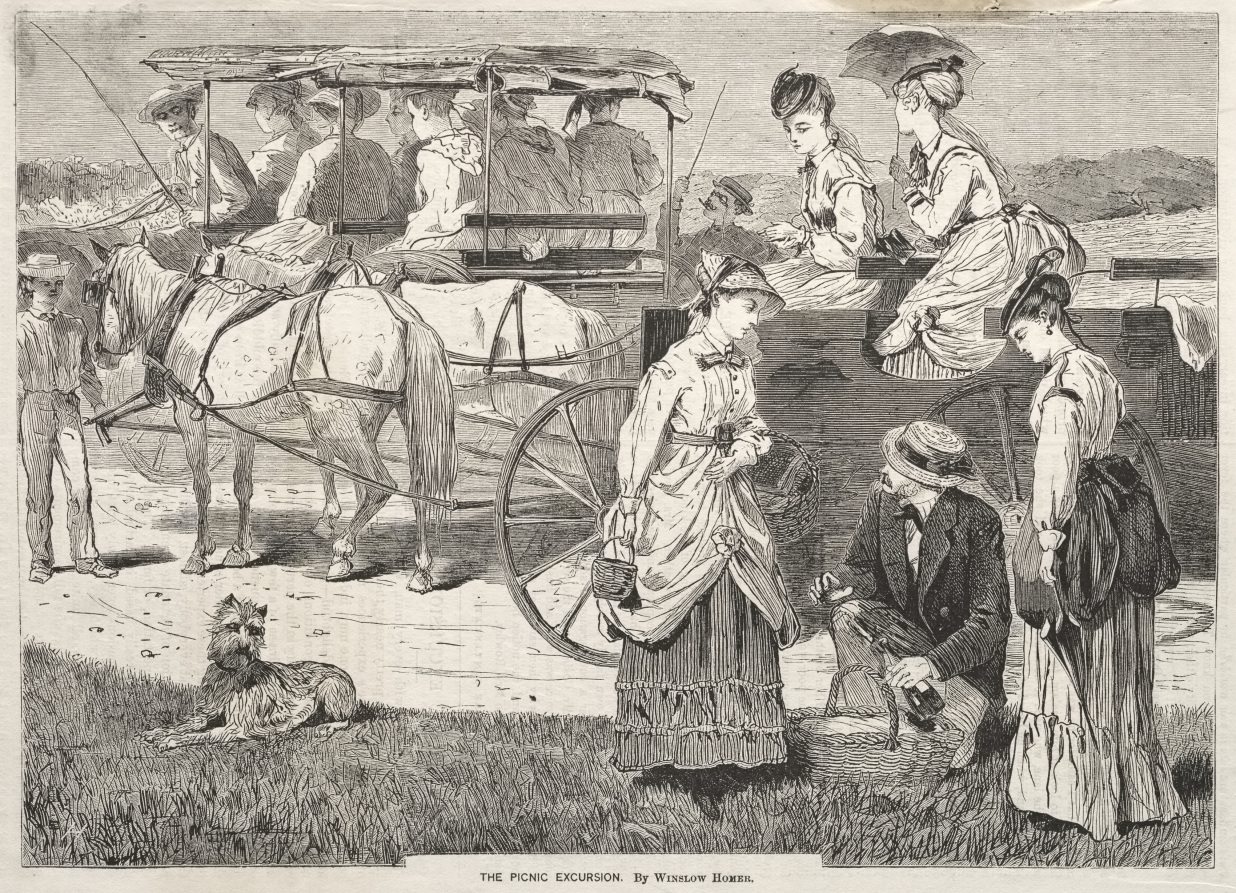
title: The Picnic Excursion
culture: America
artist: Winslow Homer (American, 1836–1910)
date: 1869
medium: wood engraving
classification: Print